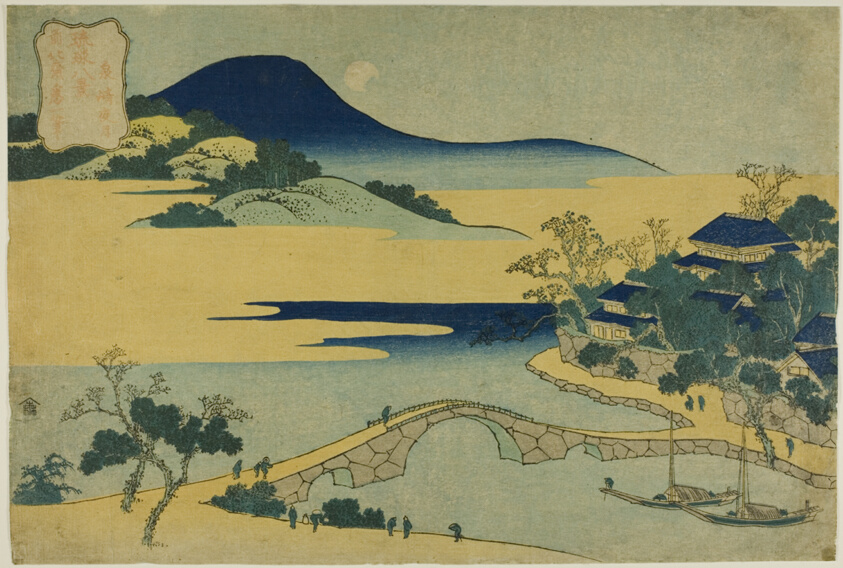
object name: Print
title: Evening Moon at Izumizaki (Izumizaki yagetsu), from the series “Eight Views of Ryukyu Islands (Ryukyu hakkei)”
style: Japanese (culture or style)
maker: Katsushika Hokusai 葛飾 北斎; Japanese, 1760–1849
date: c. 1832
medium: Color woodblock print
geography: Japan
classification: woodblock print; print